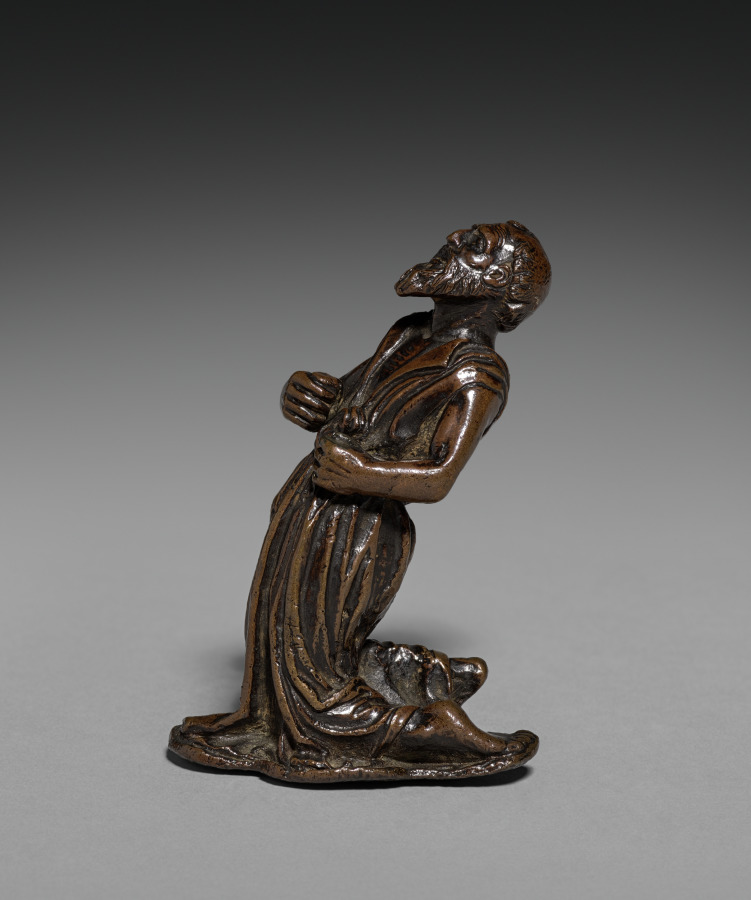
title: Kneeling Saint Jerome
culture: Italy, Ravenna, 16th century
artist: workshop of Severo da Ravenna (Italian, c.1496–c.1543)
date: c, 1525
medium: bronze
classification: Sculpture